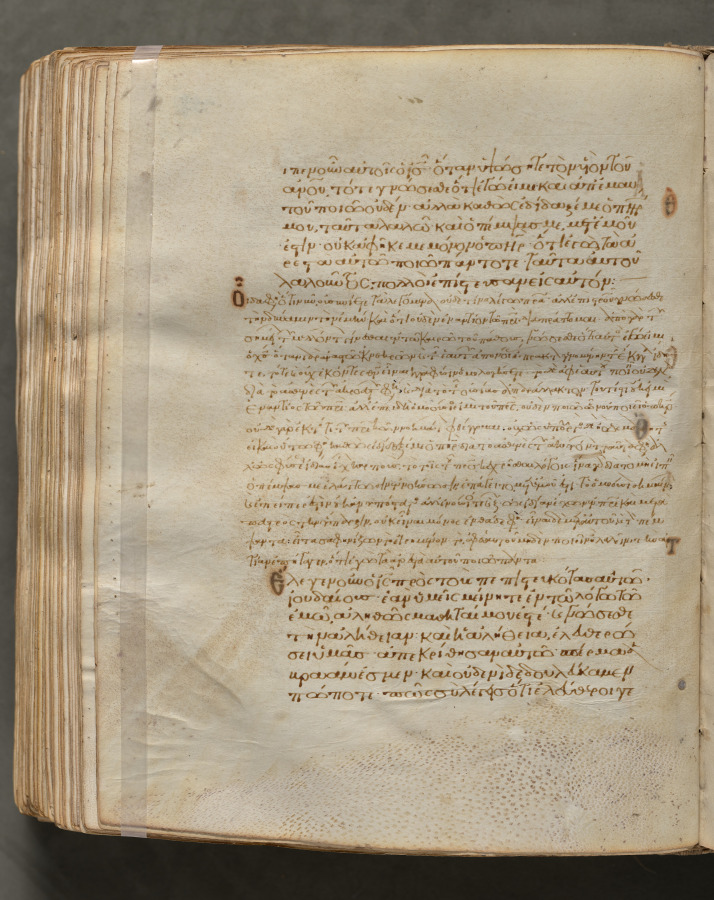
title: Text, folio 364 (verso), from a Gospel Book with Commentaries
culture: Byzantium, Constantinople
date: c. 1000–1100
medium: ink, tempera, and gold on vellum; leather binding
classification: Bound Volume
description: Each of the four gospels in this book opens on a page with brilliantly illuminated borders depicting the author of the text as well as birds—principally peacocks, symbols of the immortality of the soul—and fountains, representing the fountain of life and the salvation of the soul. This volume consists of 428 leaves with texts in Greek. Its level of sophistication suggests that it was probably written and decorated in a monastery in Constantinople.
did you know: Gospel books were carried in procession through Byzantine churches.